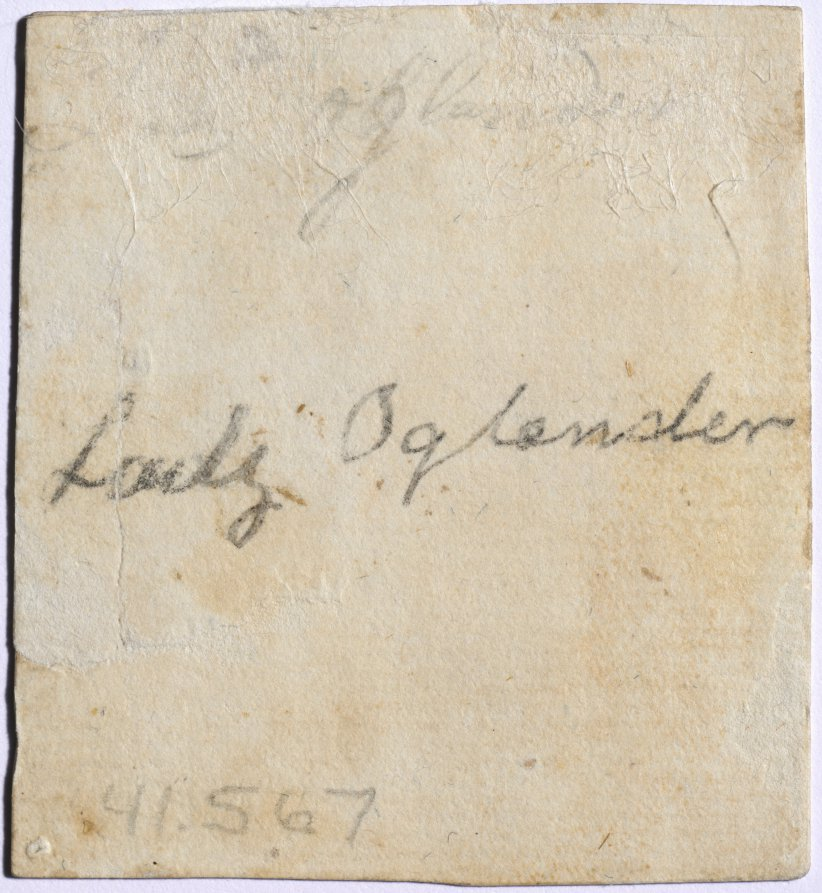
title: Portrait of Sukey, Lady Oglander, née Serle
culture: England, 18th century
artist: John I Smart (British, 1741–1811)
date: c. 1770s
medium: graphite and wash on laid paper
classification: Portrait Miniature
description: Although it is impossible to say if it was always part of the artist’s process to execute a preparatory sketch prior to painting each miniature, we do know that John Smart retained many hundreds of these sketches. A group of preparatory sketches—of which this portrait is one—descended through the Smirke family after Smart’s daughter Sarah gave a sketchbook containing preparatory portrait studies to her friend Mary Smirke, sister of the celebrated Victorian architect Sydney Smirke. This book was probably broken up around 1877 when it was divided between Sydney’s daughters Mary Jemmett and Mrs. Lange, whose portions were both sold at auction in 1928. G. C. Williamson was the first to suggest that Smart’s sketches were well known and that they were preparatory studies for the painted miniatures. Williamson listed the names of sitters from the sketches known to him at the time, and they include Lady Oglander. This portrait was assigned the historically colorful but fictitious title of “Duchess of Bourbon” at some point after memory of its true identity had been lost. Giving illustrious titles to portraits of unknown sitters was a popular strategy adopted by dealers during the nineteenth and twentieth centuries, often applied to miniature portraits and, in particular, to Smart’s sketches of women. However, when the paper backing was removed from this miniature, the name Lady Oglander was discovered written twice in graphite on the back. The lower inscription seems to have been reinforced or written later and is probably not in the artist’s hand. Compared to his contemporaries George Engleheart (1752–1829) and Andrew Plimer (1763–1837), whose female sitters were often painted in similar simple white gowns, Smart often lavished more attention on the costumes in his portraits of women, whose dresses incorporated colored silks, printed fabrics, and luxury trimmings like lace and fur, as seen here. The sitter’s head and shoulders face right, and her light hair is dressed high, with flat curls at the back of her head. She has gray eyes and wears a lavender surcoat trimmed with ermine, over a turquoise blue, low-necked dress and white underslip bordered with lace; the ermine trim confirms that the sitter was a titled lady. Smart placed her inside a faintly suggested oval, and the background is unpainted. Sukey, Lady Oglander (née Serle, d. 1805), married Sir William Oglander, 5th Baronet of Nunwell (1733–1806), in 1765. She was the only daughter of Peter Serle of Testwood, Hants, and delighted the Oglander family by bringing £10,000 to the marriage. Sukey had eleven children with William, eight of whom survived childhood. The Oglanders were a prominent and well-loved family on the Isle of Wight, their presence on the island first dating from the time of William the Conqueror and lasting until the title expired in 1874 when the last Oglander Baronet of Nunwell died. This preparatory sketch somewhat resembles a miniature on ivory of the same size that sold at Christie’s, London, in 2000. The sitter’s name is unknown, but she wears a nearly identical green wrap gown and underslip and a lavender surcoat, though it is trimmed with brown fur rather than ermine. Her coiffure is similar to that in the preparatory sketch as well, though in the ivory her hair is ornamented with pearls. The facial features, however, differ, with the sketch representing an older woman having somewhat coarser features. While the portrait may have been idealized in the finished ivory version, it is also possible that the sketch was employed primarily for the costume and depicts another sitter entirely. Daphne Foskett lists among Smart’s work portraits of a Dr. John Oglander and a Lady and Miss Oglander. A preparatory sketch by Smart of a Mr. Oglander sold at Christie’s, London, on June 10, 2010. Another preparatory sketch titled Portrait of John Oglander, Warden of New College, Oxford, was sold at Bonhams, London, on October 30, 2001. These sketches are approximately the same size as Cleveland’s Lady Oglander and may have been commissions related by date or patron. The sale of Smart drawings inherited by W. H. Bose and sold at Christie’s, London, in 1937 included a “Head of Miss Oglander,” “sister to Sir John Oglander of the Isle of Wight,” but this lot was not illustrated, and its relationship to the sketch discussed here is unknown. John Oglander, Warden of New College, Oxford, was the brother-in-law of Sukey, Lady Oglander, and Miss Oglander was probably her sister-in-law Susannah Oglander (d. 1816).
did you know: Sketches helped John Smart work out the particulars of a portrait before commencing the miniature on ivory, and they were useful in the event that a duplicate might later be required.